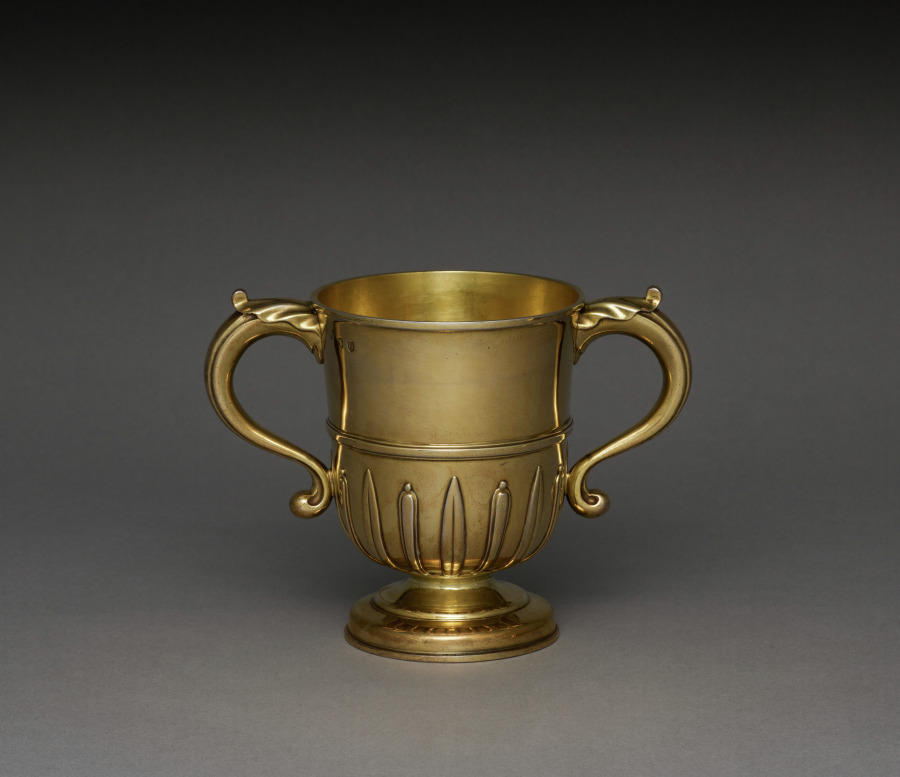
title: Covered Cup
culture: England, London, 18th century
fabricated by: Gabriel Sleath (British, 1674–1756)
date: 1723–1724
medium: silver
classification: Silver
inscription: engraved in the center of the cup is a demi-lion, rampant passant, holding an unknown object on an irregularly shaped shield surrounded by baroque manteling. In style, it is appropriate for date of cup but does not appear a true coat of arms. On the cover is a crest consisting of a demi-lion, rampant passant, between open buffalo horns. These heraldic devices perhaps refer to some entity rather than an individual.